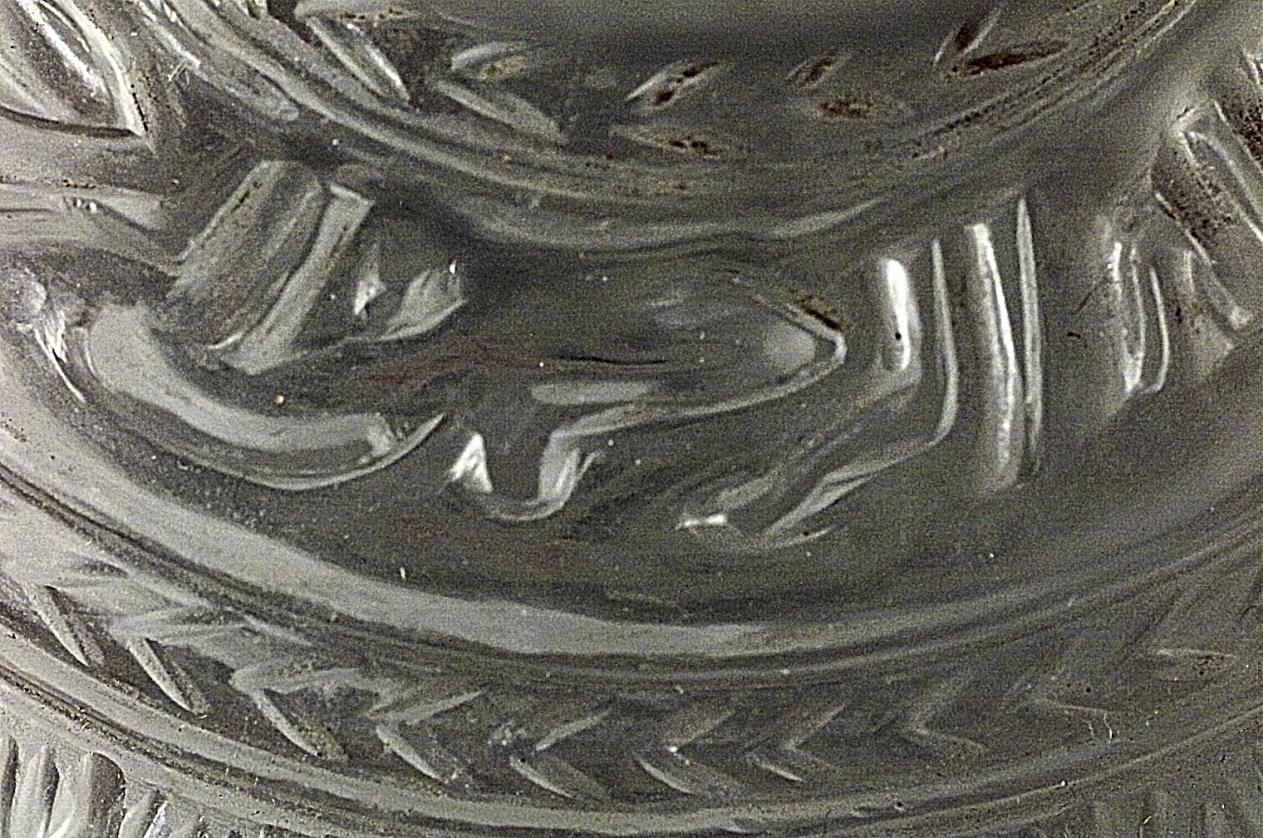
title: Hookah Bowl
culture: India, Mughal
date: 1700s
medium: glass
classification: Glass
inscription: Inscription in Farsi, on body: Even if live charcoal is placed on its head/ The hookah, a teacher of etiquette,/ will not respond unless drawn upon;/ Thus one can learn from its manners of refinement.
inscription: Inscription in Farsi, on shoulder: In the name of Allah the clement and merciful is the key to the wise treasure.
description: The inscription around the body of the base speaks to the use of the hookah in the decadent life of the Mughal court. The hookah is commended for being a proper, refined servant who will not “respond unless drawn upon” or, produce water bubbles when smoke is drawn through the hose. Undoubtedly the witty, poetic allusions would have been appreciated at banquets and other courtly gatherings. The use of wheel-cut glass for this hookah base may have been influenced by English glass and lead crystal that was exported to India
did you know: Around the top of this hookah bowl are incised the opening two lines from the Khamsa (Quintet) of the celebrated Persian poet Nizami (1141–1209).